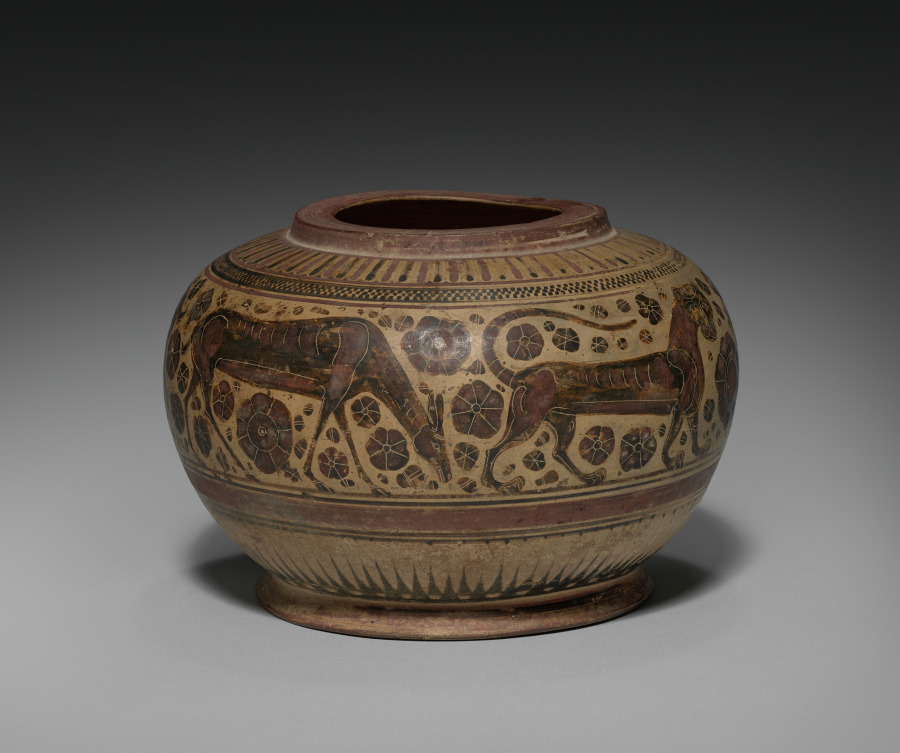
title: Corinthian Vase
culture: Greece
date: 600s BCE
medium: earthenware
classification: Ceramic